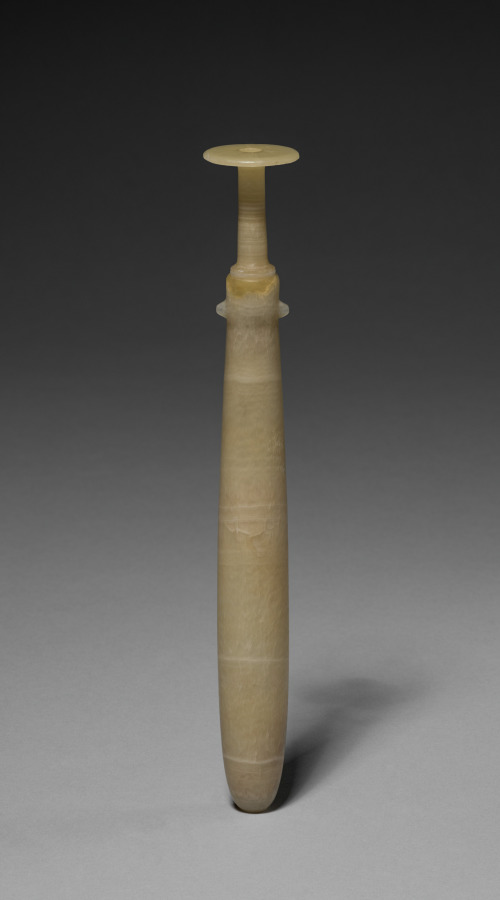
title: Alabastron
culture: Egypt, Greco-Roman period (332 BCE–395 CE), Ptolemaic dynasty (305–30 BCE)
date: 305–222 BCE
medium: travertine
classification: Vessels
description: Both ancient Egyptian men and women loved cosmetics. Unguents, oils, and perfumes made from aromatic plant resins and gums were obtained at great cost from distant lands. The objects identified with cosmetics were given lavish treatment.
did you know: This perfume holder might have been attached to a string, making it easily portable.